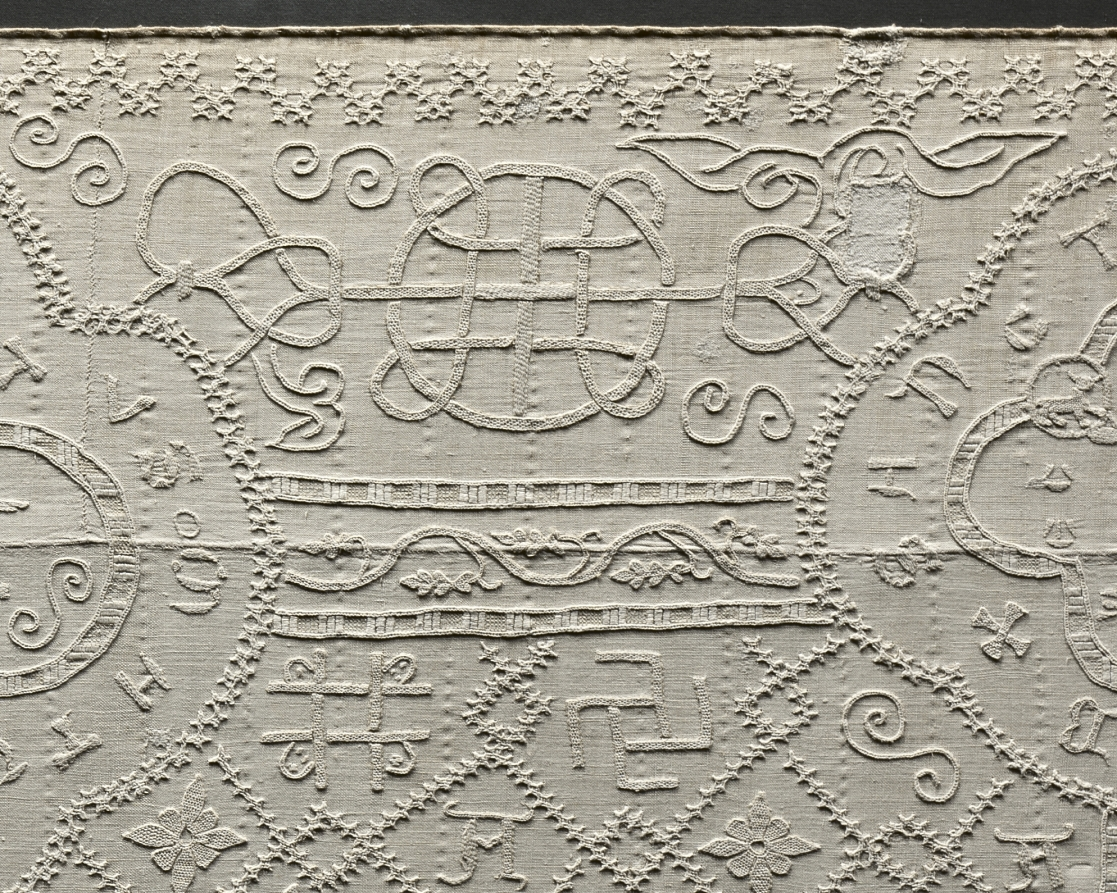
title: Altar Cloth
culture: Germany, Altenberg on the Lahn, Premonstratensian Convent, 14th century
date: c. 1350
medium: embroidery: linen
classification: Embroidery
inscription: various motifs enclosed in quatrefoils with identifying inscriptions in Gothic letters.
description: This large, embroidered altar cloth is one of the rarest, most important medieval church furnishings in existence. It was stitched by nuns in the Premonstratensian Convent in Altenberg on the Lahn River, north of Frankfurt, Germany, and was used to cover the church’s high altar in the weeks leading up to Easter. The cloth is an example of linen embroidery, a specialty of German nuns in the later Middle Ages. The Altenberg monastery church once had valuable furnishings; the high altar retable (a decorated frame with sculptures and paintings on the top of an altar) has survived, the main parts of which are now in the Städel Museum in Frankfurt, Germany.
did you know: When lit from behind, the previously hidden details emerge and the complex design becomes evident.